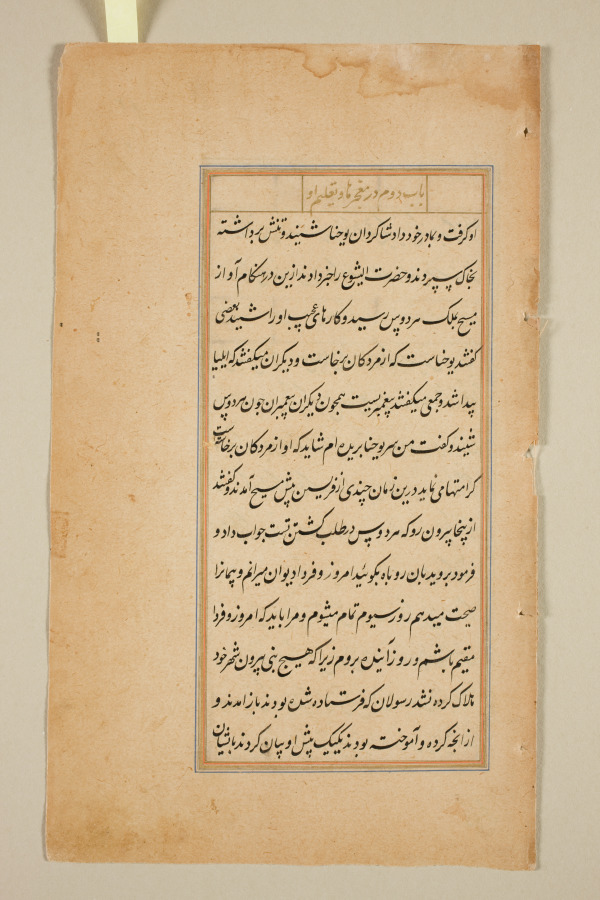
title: Text page from a Mirror of Holiness (Mir’at al-quds) of Father Jerome Xavier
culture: Mughal India, Allahabad, made for Prince Salim (1569–1627)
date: 1602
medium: Ink and gold on paper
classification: Manuscript